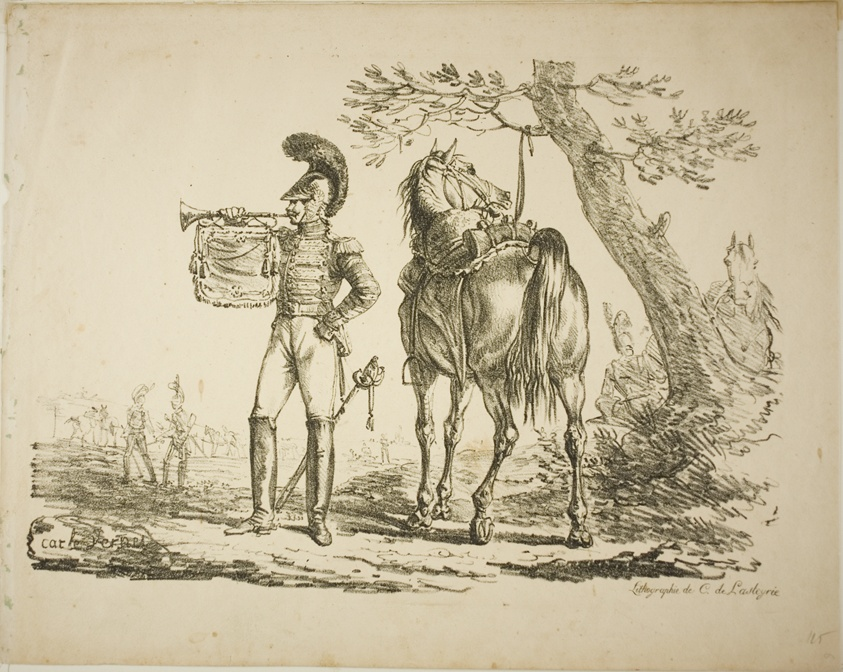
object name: Print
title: Trumpeter of the Riflemen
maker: Carle Vernet (French, 1758-1836); printed by Comte de Charles Philibert Lasteyrie du Saillant (French, 1759-1849)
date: March 26, 1817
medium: Lithograph in black on tan wove paper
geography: France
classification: lithograph; print; prints and drawing